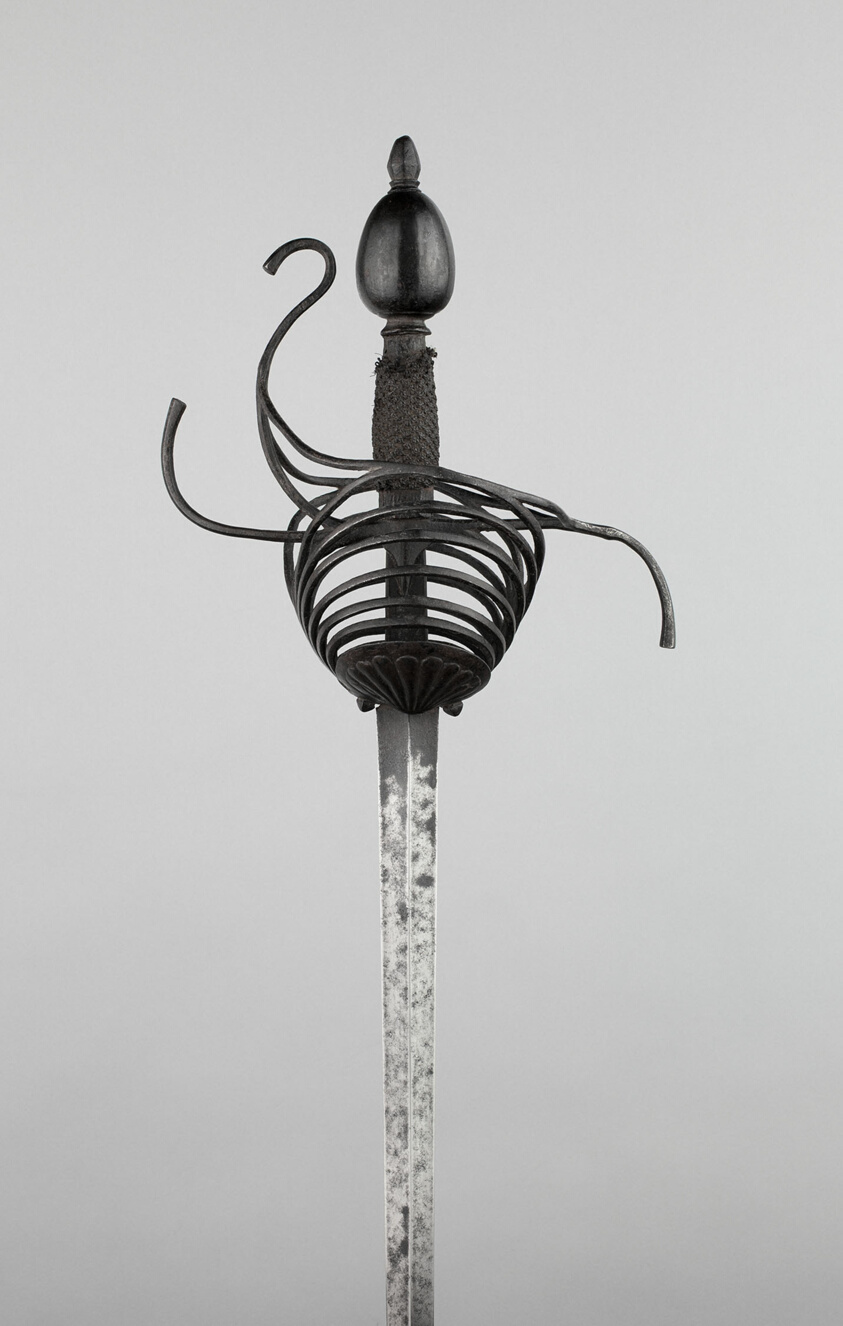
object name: Arms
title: Rapier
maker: Italian or Spanish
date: c. 1630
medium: Steel, iron, textile, and wood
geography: Italy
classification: edged weapon-sword; arms; arms and armor